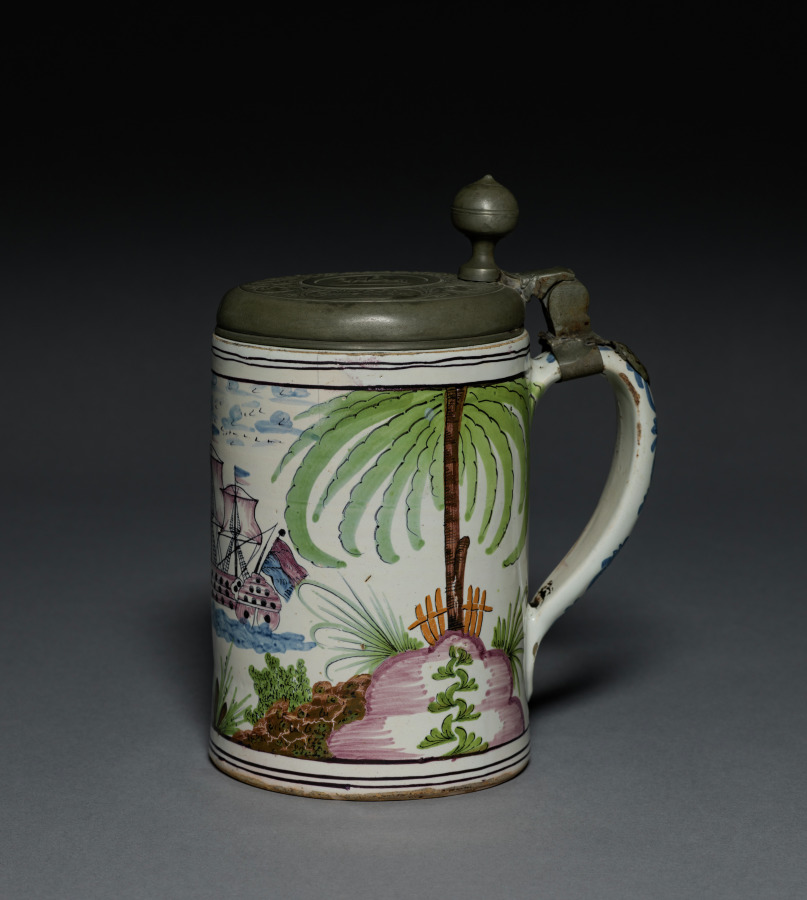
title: Tankard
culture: Germany, Aumund (Vegesack), 18th century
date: c. 1750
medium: faience with pewter cover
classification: Ceramic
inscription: inscribed on pewter cover: "Johan/Grother" (probably name of first owner).